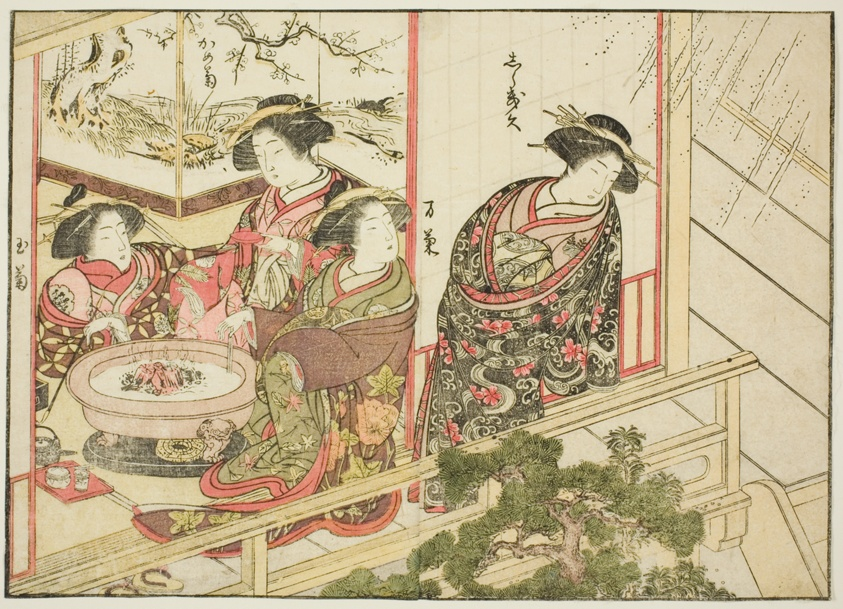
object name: Print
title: Courtesans of the Kiribishiya, from the book "Mirror of Beautiful Women of the Pleasure Quarters (Seiro bijin awase sugata kagami)," vol. 2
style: Japanese (culture or style)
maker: Katsukawa Shunsho; Japanese, 1726-1792; Kitao Shigemasa; Japanese, 1739-1820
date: 1776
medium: Color woodblock print; double-page illustration cut from a book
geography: Japan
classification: woodblock print; print; asian art